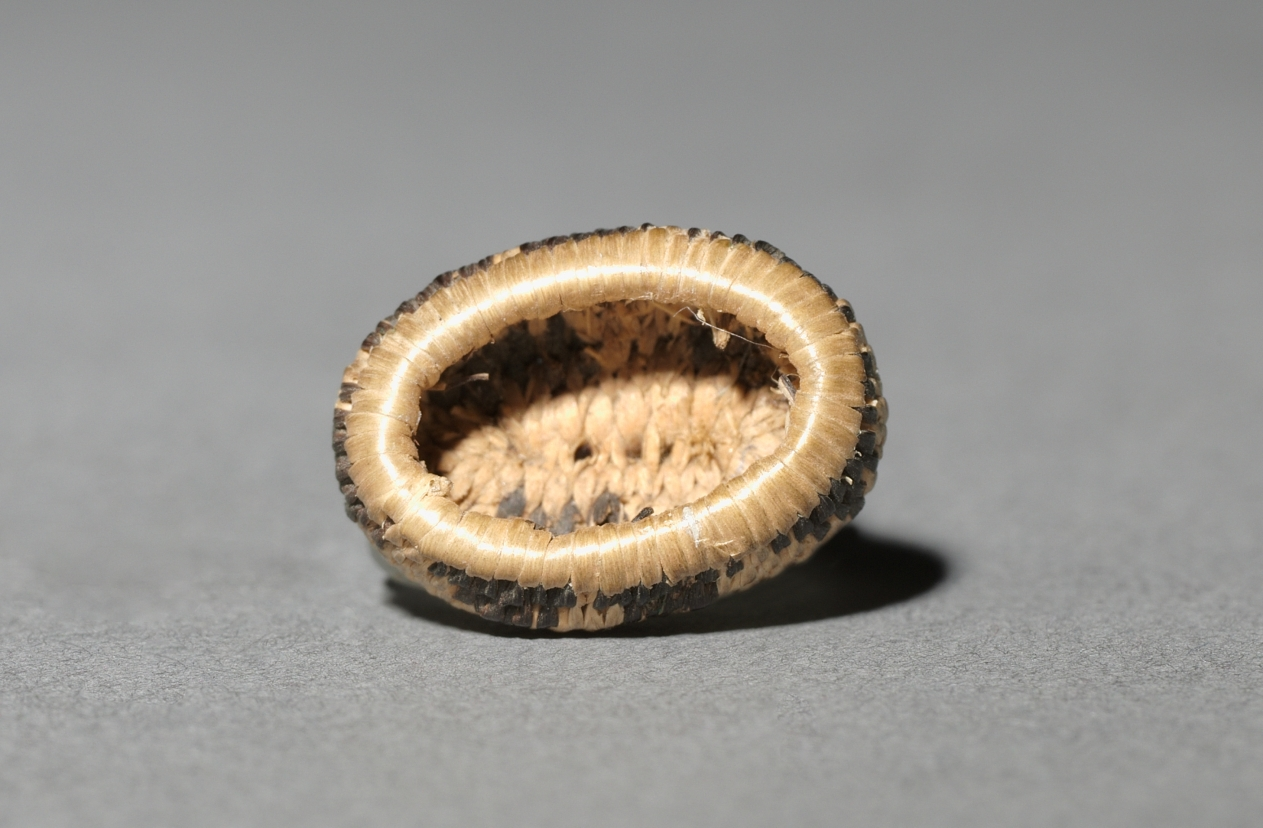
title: Miniature Oval Basket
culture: California, Pomo, 20th century (?)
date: Early 1900s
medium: coiled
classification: Basketry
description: Miniature baskets were made to demonstrate the basket-maker’s virtuoso skill, and these tiny marvels seem to be no exception—the smallest are just a few millimeters wide but still patterned. For such fine work, dexterity was required as much for preparation of materials as for weaving.